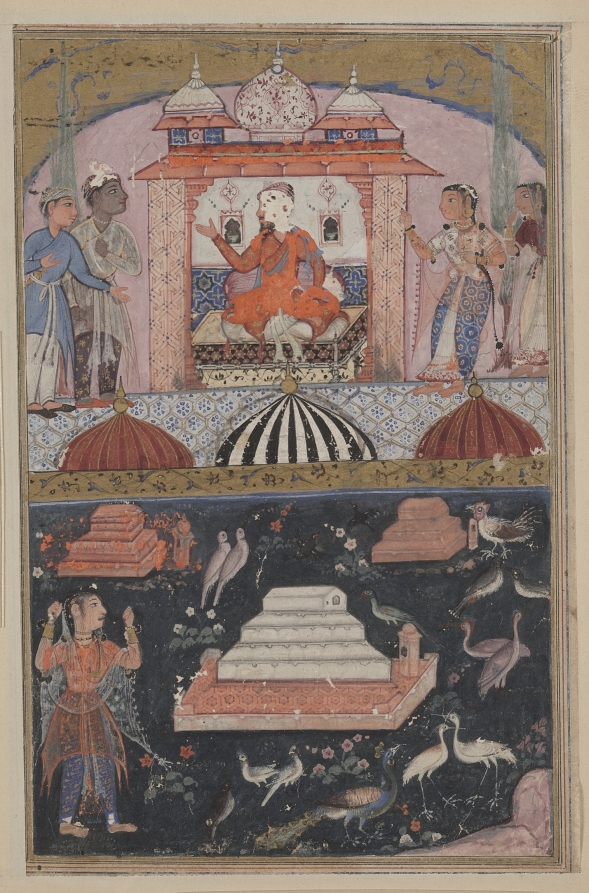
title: The merchant hears of his wife’s unfaithfulness (above); the unfaithful wife performs penance by plucking her hair (below), from a Tuti-nama (Tales of a Parrot): First Night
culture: Mughal India, court of Akbar (reigned 1556–1605)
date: c. 1560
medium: gum tempera, ink, and gold on paper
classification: Painting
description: In the upper register the merchant is surrounded by gossiping members of his household. Below, birds surround his unfaithful wife. The merchant’s parrot, whom the wife tried to kill, perches on the edge of a tomb to observe her act of penance. Once her penance is complete, the parrot reunites the couple, and the wife is welcomed home.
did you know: The birds in the garden have gathered in in sympathy with the parrot’s plight.